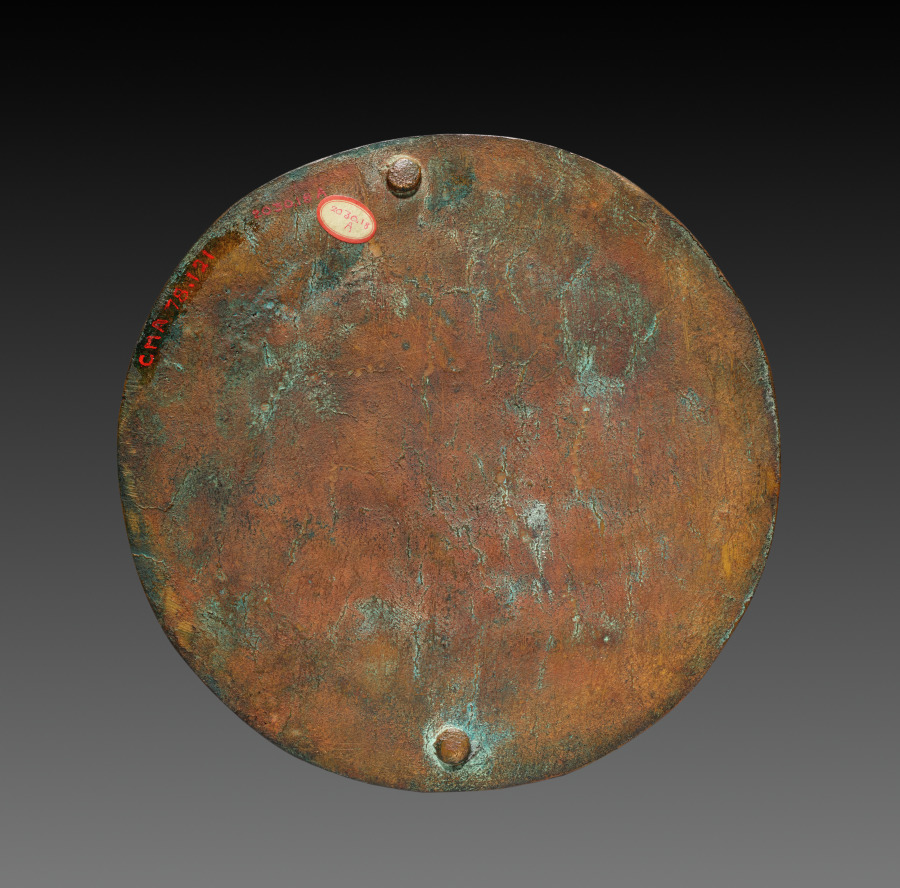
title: Medal: Loïe Fuller (reverse)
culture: France, 20th century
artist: Pierre Roche (French, 1855–1922)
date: 1900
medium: bronze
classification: Metalwork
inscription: "1900/Un etre/qui/n'etait/que/lumière or et gaze" (Baudelaire ?). Signed beneath: R in an irregularly shaped circle.